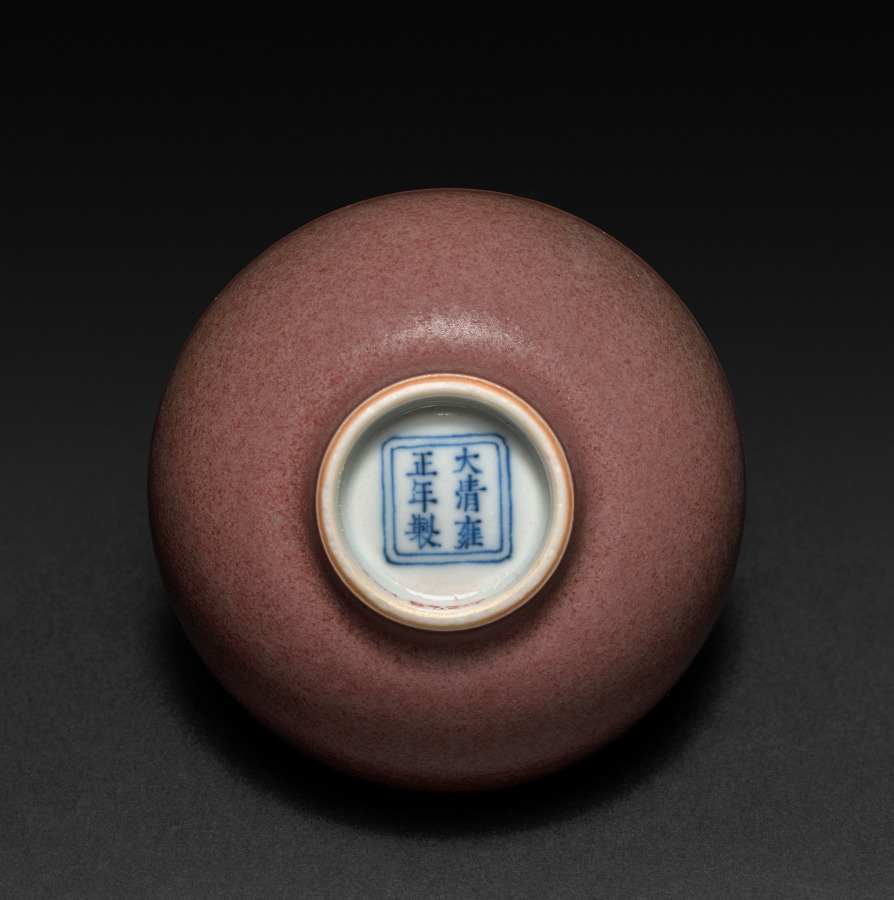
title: Cup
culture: China, Jiangxi province, Jingdezhen kilns, Qing dynasty (1644-1911)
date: 1700s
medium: porcelain with mottled blue glaze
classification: Ceramic